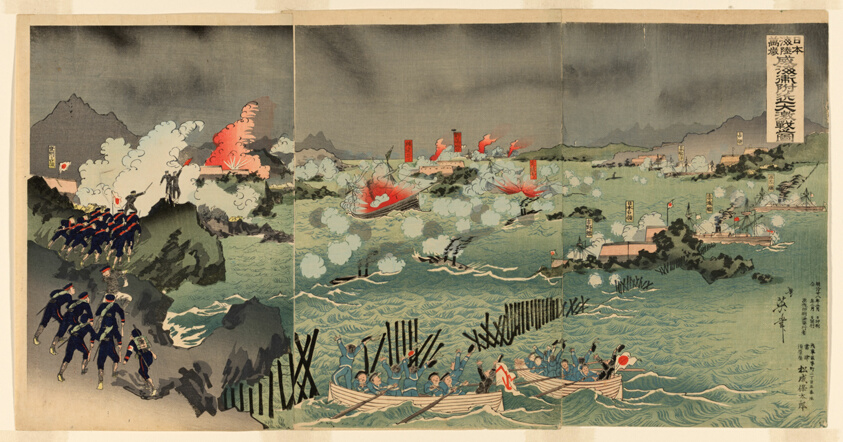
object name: Print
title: Long Live the Japanese Navy and Army! The Great Battle near Weihaiwei (Nihon kairiku banzai, Ikaiei fukin daigekisen no zu)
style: Japanese (culture or style)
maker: Kobayashi Ikuhide (Japanese, active c. 1885–98)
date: 1895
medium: Color woodblock print; oban triptych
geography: Japan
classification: woodblock print; print